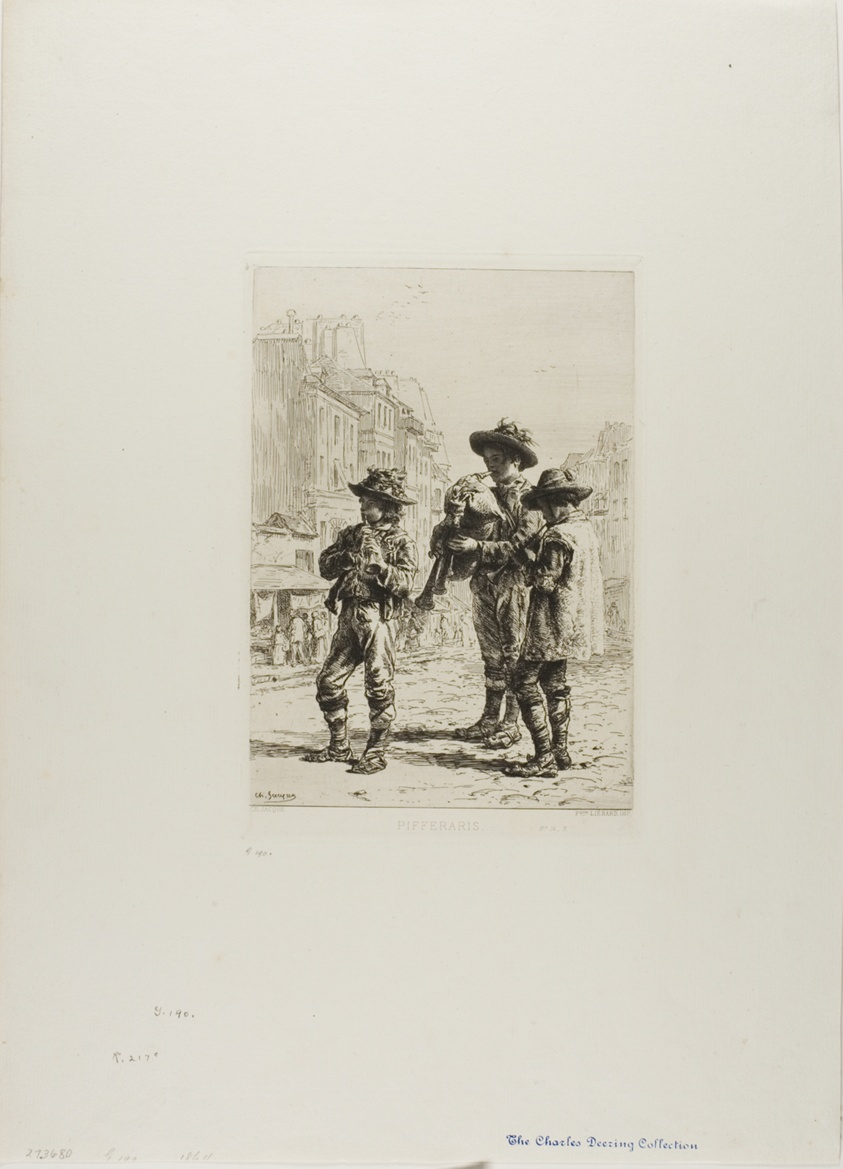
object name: Print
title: Pifferari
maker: Charles Émile Jacque (French, 1813-1894)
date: c. 1865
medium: Etching and engraving on ivory laid paper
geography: France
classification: etching; print; prints and drawing